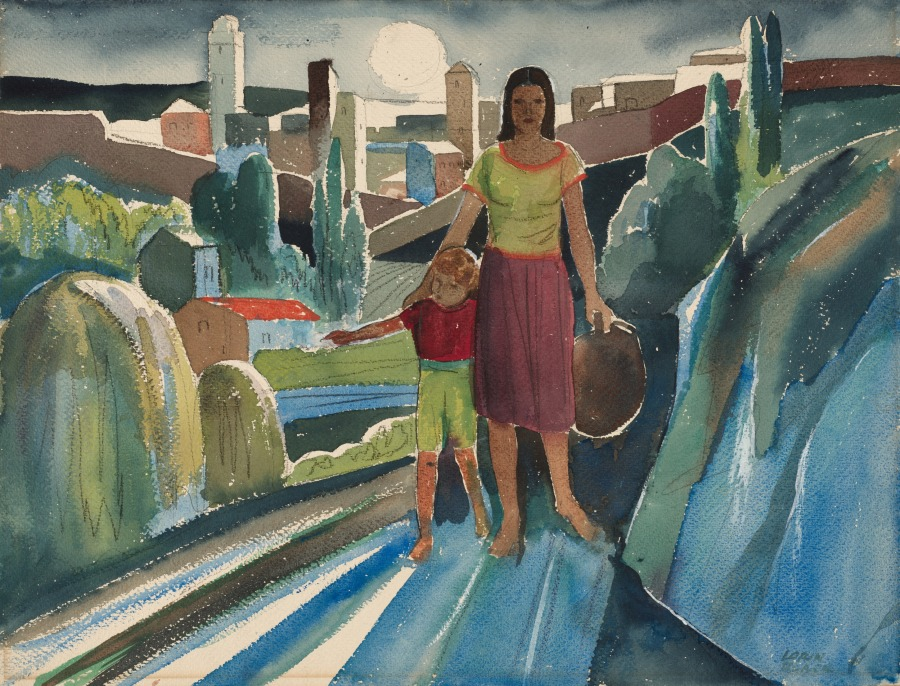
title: The Moon of San Gimignano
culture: America, Ohio, Cleveland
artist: John Lorin Black (American, 1894–1963)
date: 1929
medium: watercolor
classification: Drawing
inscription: Signed Lorin Black in lower right